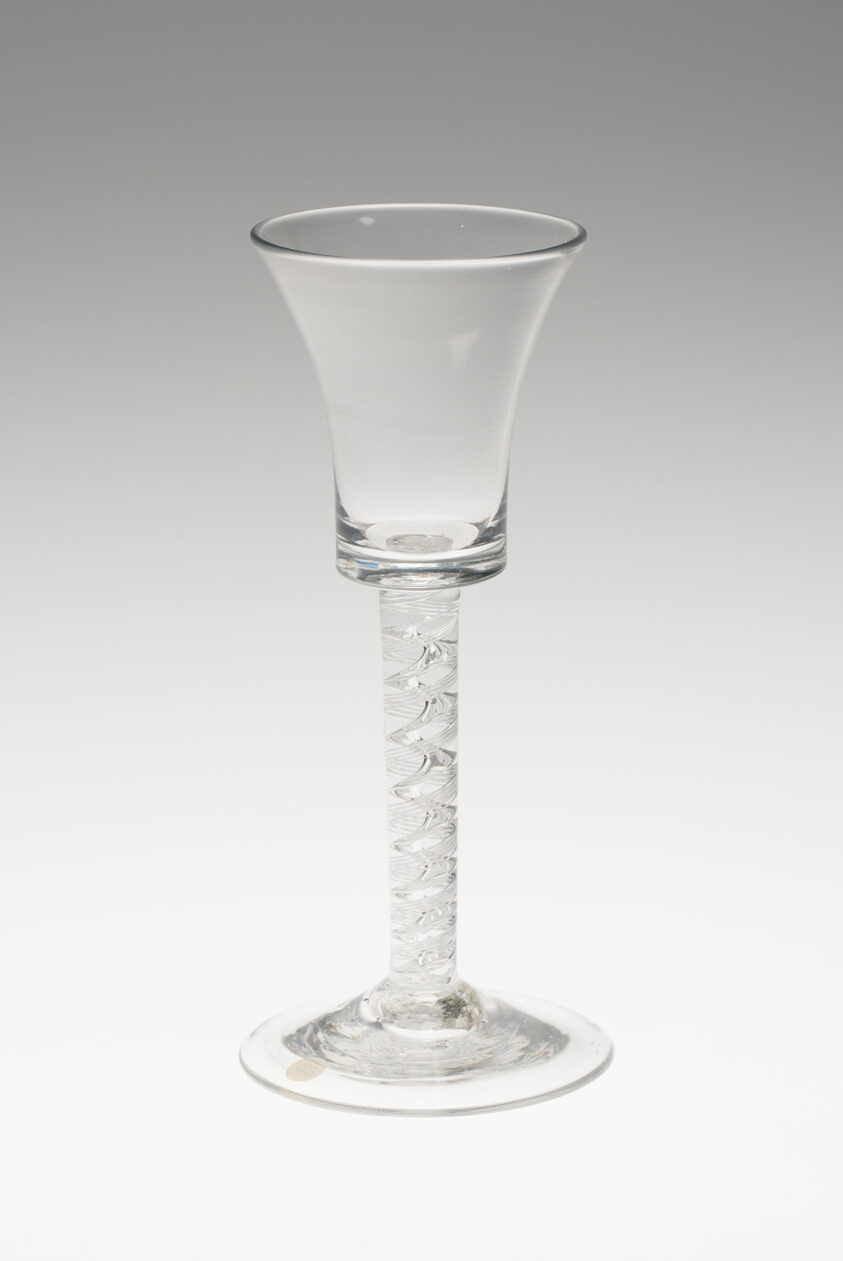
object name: Glass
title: Wine Glass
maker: England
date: c. 1745/50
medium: Glass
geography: England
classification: drinking vessel; glass